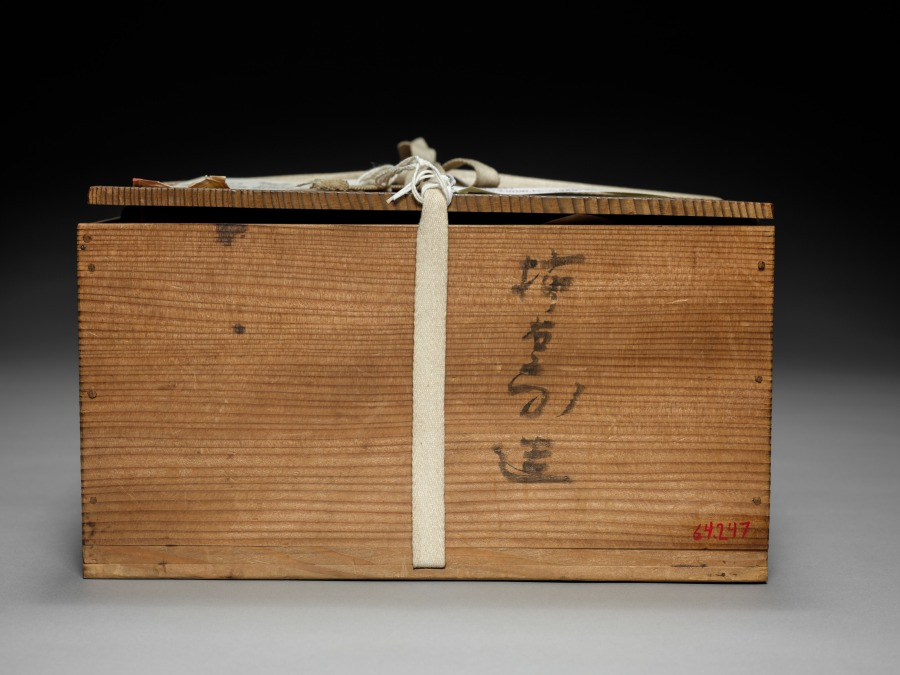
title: Bowl with Lion and Flowers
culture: Japan, Edo period (1615–1868)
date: 1700s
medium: porcelain, molded, with underglaze blue and overglaze color enamel (Hizen ware, Kakiemon type)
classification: Ceramic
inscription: 金